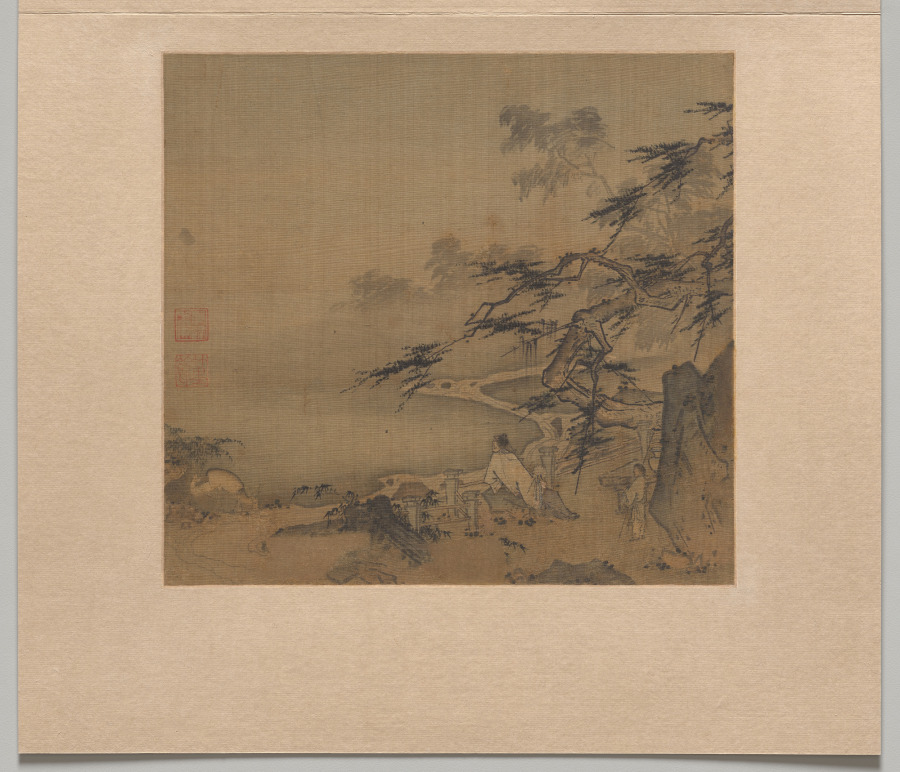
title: Watching the Deer by a Pine Shaded Stream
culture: China, Southern Song dynasty (1127-1279)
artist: Ma Yuan (Chinese, c. 1150–after 1255)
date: 1127–1279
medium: Album leaf; ink and light color on silk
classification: Painting